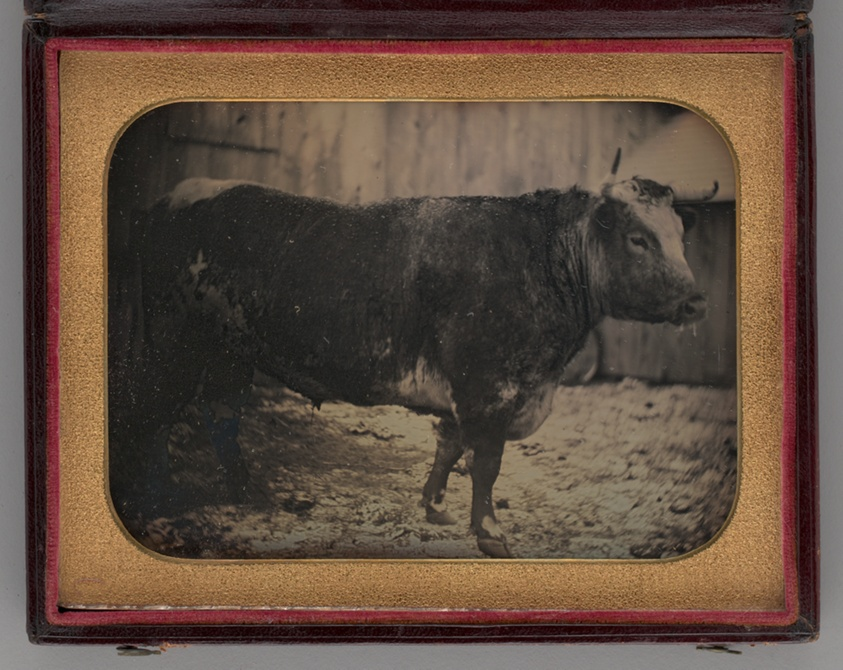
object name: Photograph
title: Untitled (Portrait of Bull)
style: 19th century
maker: Unknown maker; American, 19th century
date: 1847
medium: Daguerreotype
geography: United States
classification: portrait; daguerreotype; portrait; photograph; photographic process; photography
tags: lundberg collection, animals, bull, portrait